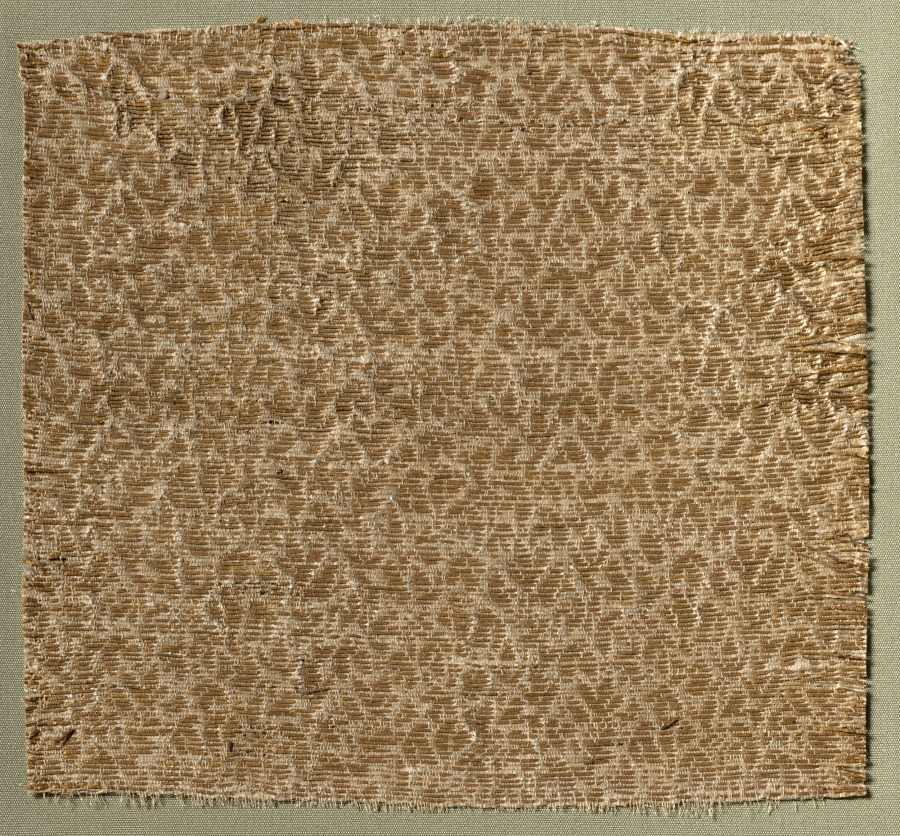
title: Textile with Tiny Leaves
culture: Central Asia, Il-khanid (Mongol) period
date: 1275–1350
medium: Silk and gold thread; tabby with supplementary weft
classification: Textile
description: The shimmering gold of the tiny scattered leaves in this silk perfectly suited the taste of the Mongol court. Showing no Chinese or eastern Iranian influence, this type of pattern appears to have been indigenous to eastern Central Asia. The closest parallels to the tiny leaves densely strewn across the surface are found among the silk tapestries of the Uyghurs.